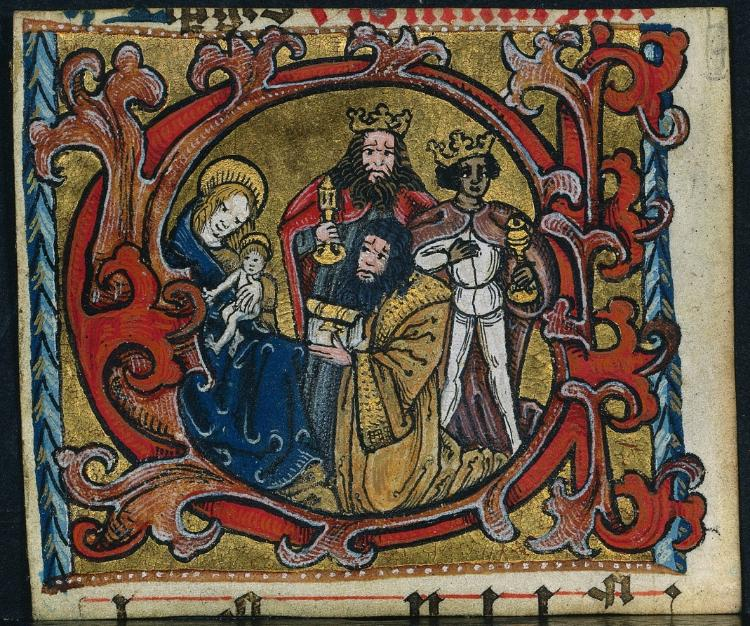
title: Three Cuttings from a Missal: Initial C with the Adoration of the Magi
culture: Germany, Franconia or Saxony (?) or Silesia (?), 15th century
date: c. 1470–1500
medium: ink, tempera and gold on vellum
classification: Manuscript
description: These three cuttings are illuminated in a style that is somewhat provincial and difficult to localize. The figures relate to late 15th-century German woodcut illustration, but also vaguely recall Franconian sculpture and Saxon painting. The figures are simply, though charmingly, sketched in heavy black ink with little attention to finesse of line or detail. The palette is confined to dark hues of red, blue, and ochre with flesh tones either left white or colored pink. The style hints at an origin in Franconia, Saxony, or Silesia. The initial E includes a form of musical notation called Hufnagalshrift or "horseshoe nail writing" because it resembles the nails used to attached horseshoes. Hufnagalshrift appears almost exclusively in manuscripts produced in Germanic Central Europe. The use of different colored lines in the musical stave is a known feature of Saxony. The text Exultet iam angelica (Rejoice now angel) begins the prayer used only on Holy Saturday during the Easter Vigil. It was sung by the priest at Mass to a very special and ancient melody.